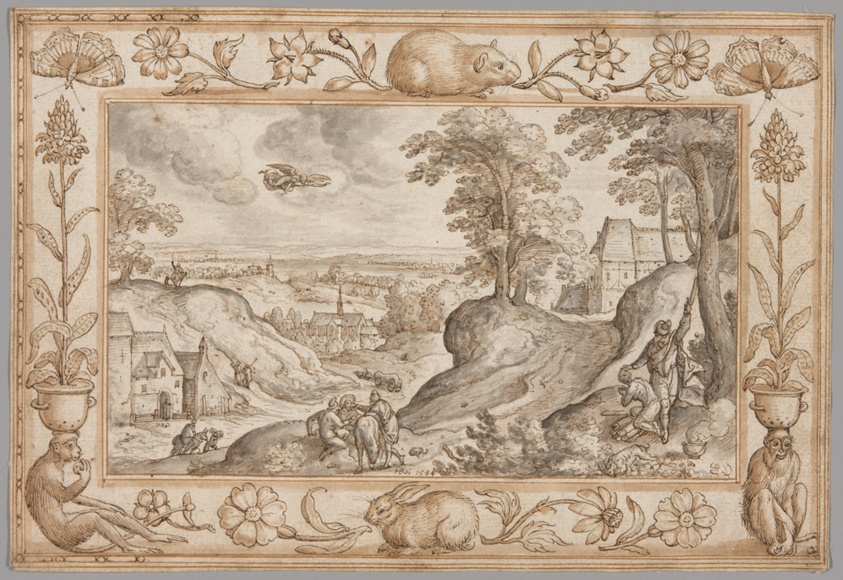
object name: Drawing and Watercolor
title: Landscape with the Sacrifice of Isaac within a Decorative Border of Plants and Animals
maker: Hans Bol (Netherlandish, 1534-1593)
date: 1584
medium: Pen and brown ink and brown and gray washes on ivory laid paper, incised with a stylus for transfer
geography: Netherlands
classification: pen and ink drawings; drawings (visual works); prints and drawing